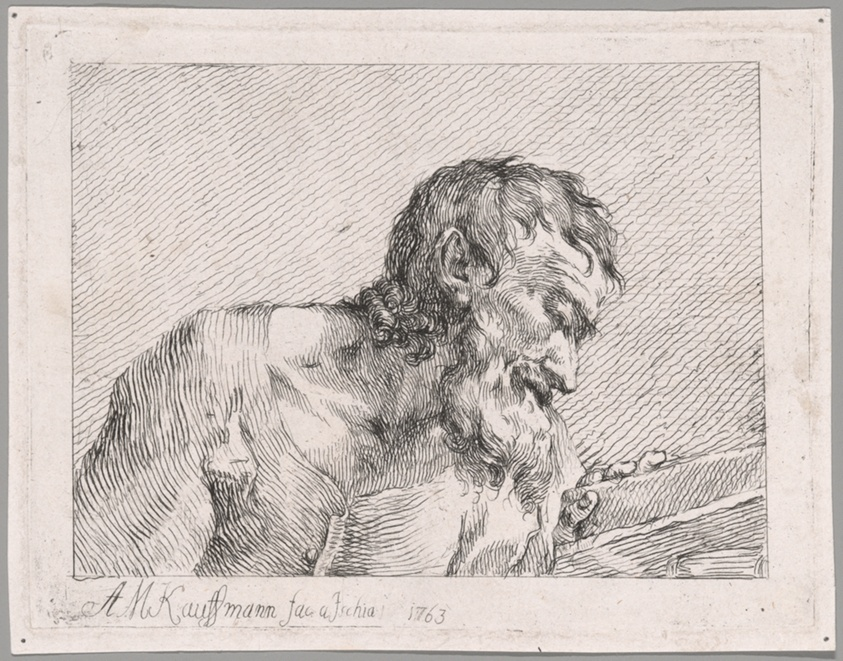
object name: Print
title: Old Man Reading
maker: Angelica Kauffmann (Swiss, 1741-1807)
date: 1763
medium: Etching in black on ivory laid paper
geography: Switzerland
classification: prints and drawing; print; paper; etching